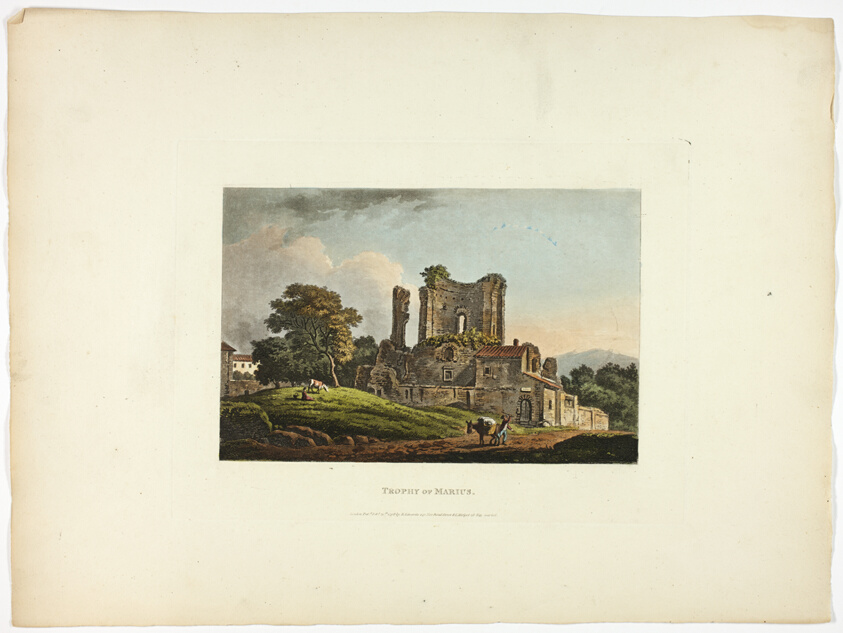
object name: Print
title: Trophy of Marius, plate thirty-one from the Ruins of Rome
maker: M. Dubourg, (English, active 1786-1838); published by J. Merigot (Italian, Unknown)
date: published February 20, 1798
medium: Hand-colored aquatint on paper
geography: England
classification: aquatint; print; prints and drawing